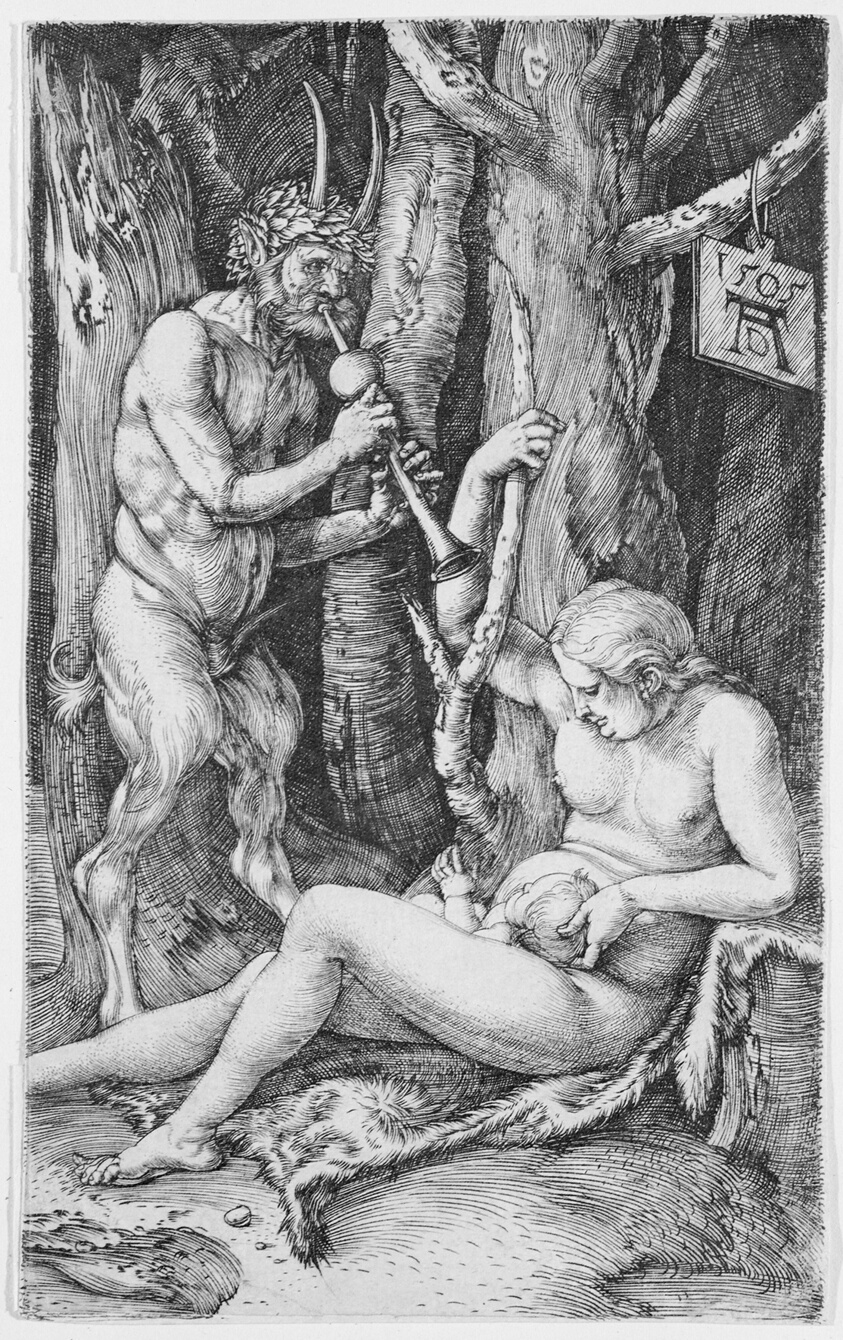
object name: Print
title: Satyr Family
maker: Albrecht Dürer (German, 1471-1528)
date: 1505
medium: Engraving in black on off-white laid paper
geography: Germany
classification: engraving; print; prints and drawing; paper